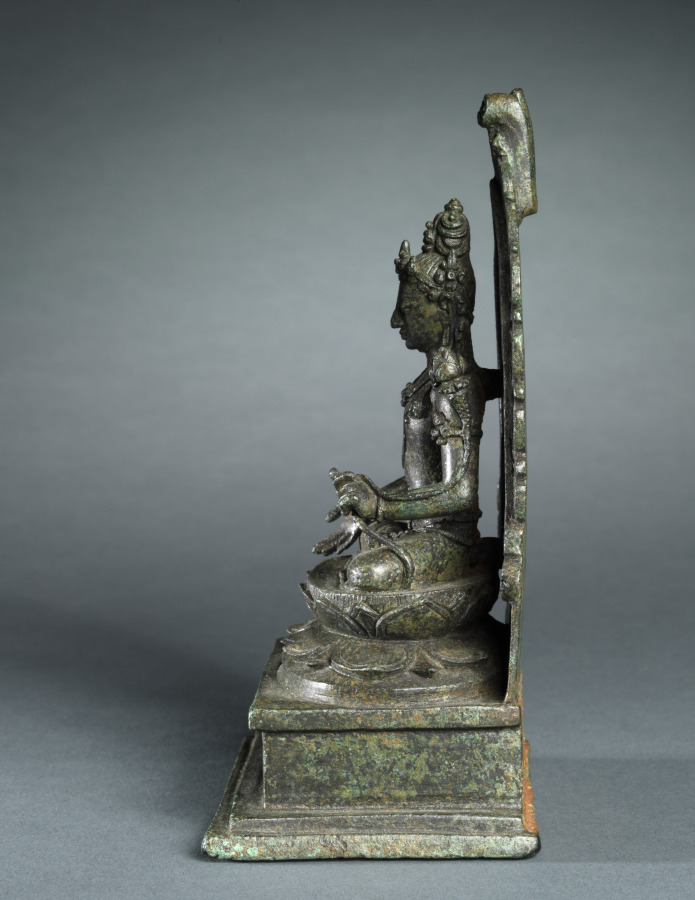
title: Seated Avalokitesvara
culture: Central Java, 9th century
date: 800s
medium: bronze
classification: Sculpture